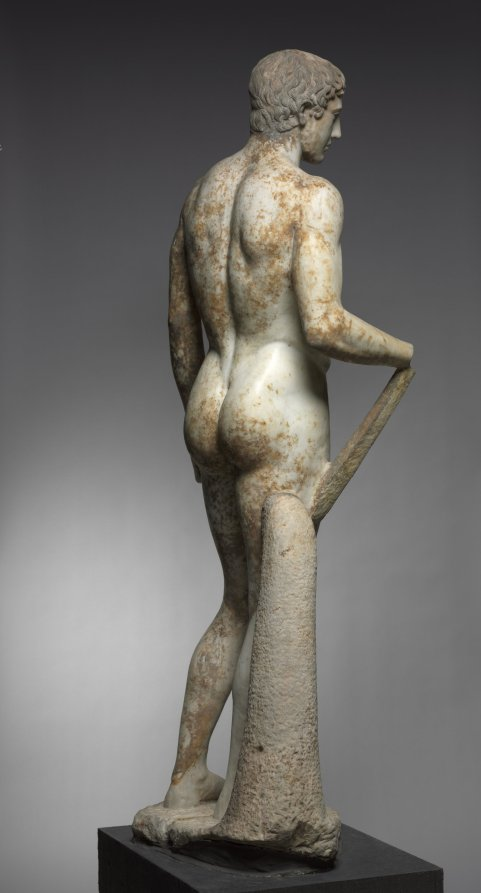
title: Statue of an Athlete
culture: Italy, Roman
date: 1–100 CE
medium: marble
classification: Sculpture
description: This idealized athlete recalls Greek sculptural types invented and popularized during the 400s BC. Large-scale athletes and other sculptures like this were originally created by famous artists as sanctuary dedications. Centuries later, they were widely copied and adapted by Roman sculptors, whose clients sought their own versions of earlier masterpieces. Working in marble rather than bronze, these sculptors added certain elements for stability, such as the struts and the large tree trunk beside the right leg here. Sculptures like this one are profoundly complex, made by and for Romans but descended from Greek ancestors.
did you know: For many years, this sculpture stood in the rotunda of the Cleveland Museum of Art.